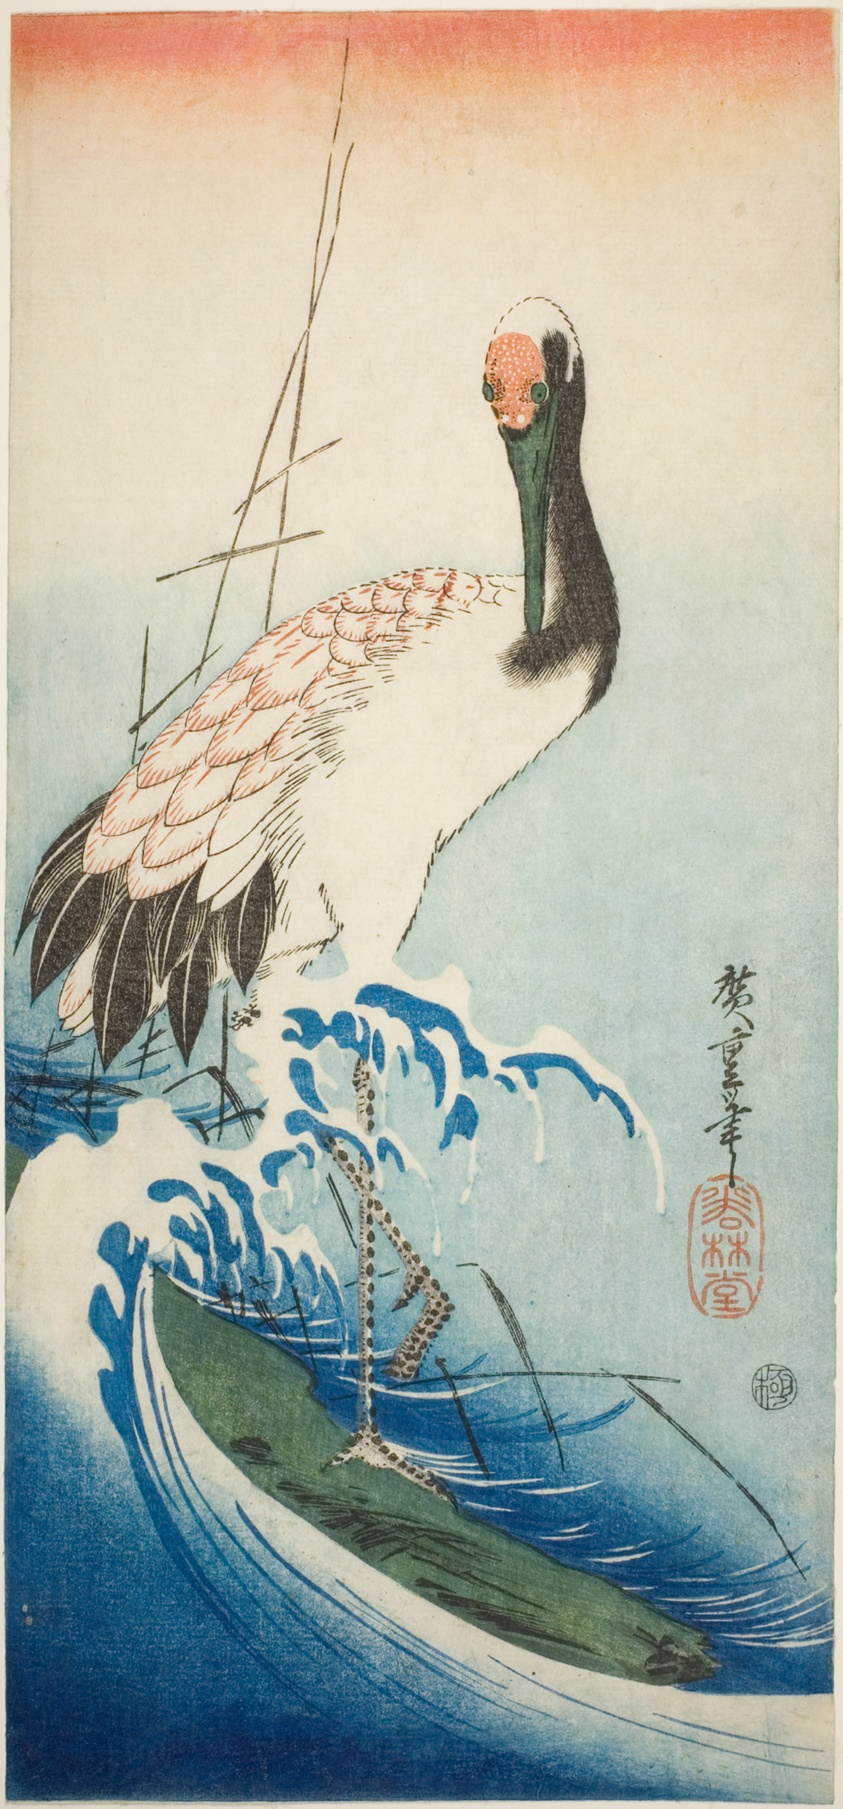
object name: Print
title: Crane and waves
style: Japanese (culture or style)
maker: Utagawa Hiroshige 歌川 広重; Japanese, 1797-1858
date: early 1830s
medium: Color woodblock print; otanzaku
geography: Japan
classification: woodblock print; print; asian art